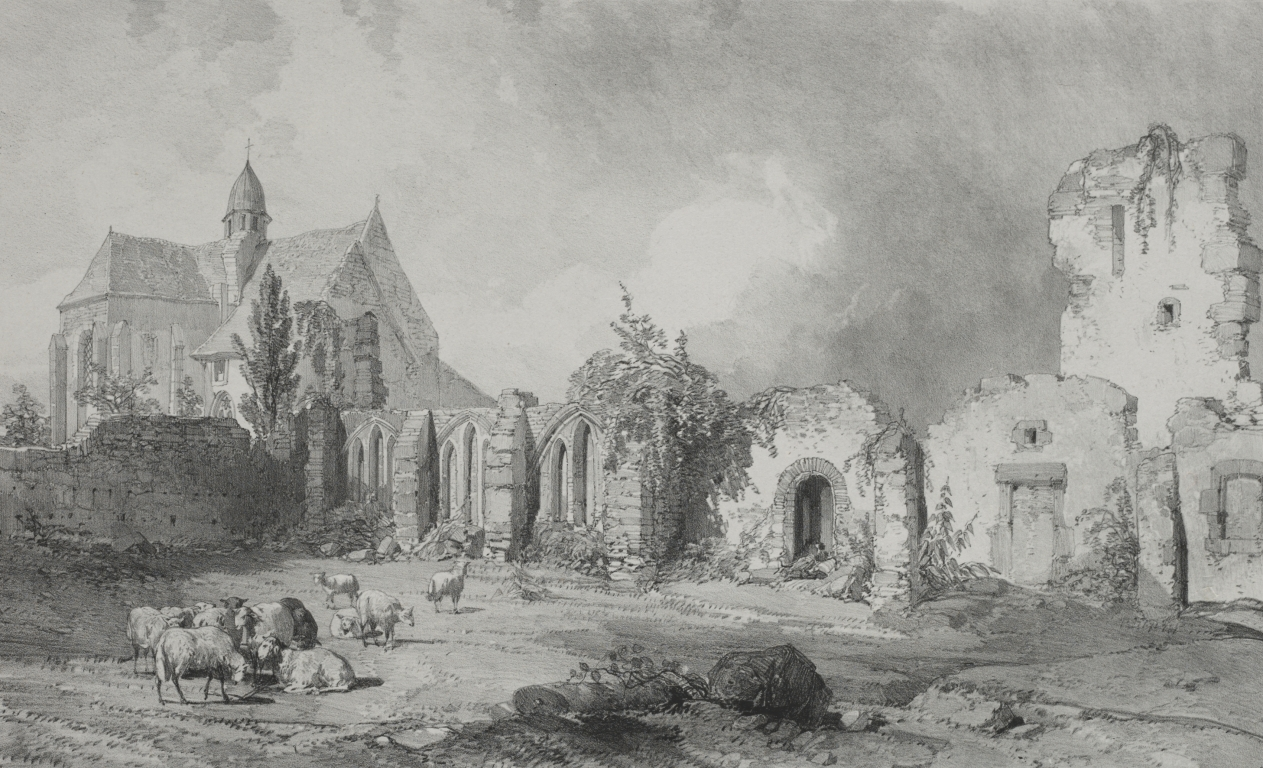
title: Voyages pittoresques et romantiques dans l'ancienne France. Bretagne: Abbaye de Relec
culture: France, 19th century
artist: Eugène Cicéri (French, 1813–1890)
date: c. 1845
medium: lithograph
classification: Print